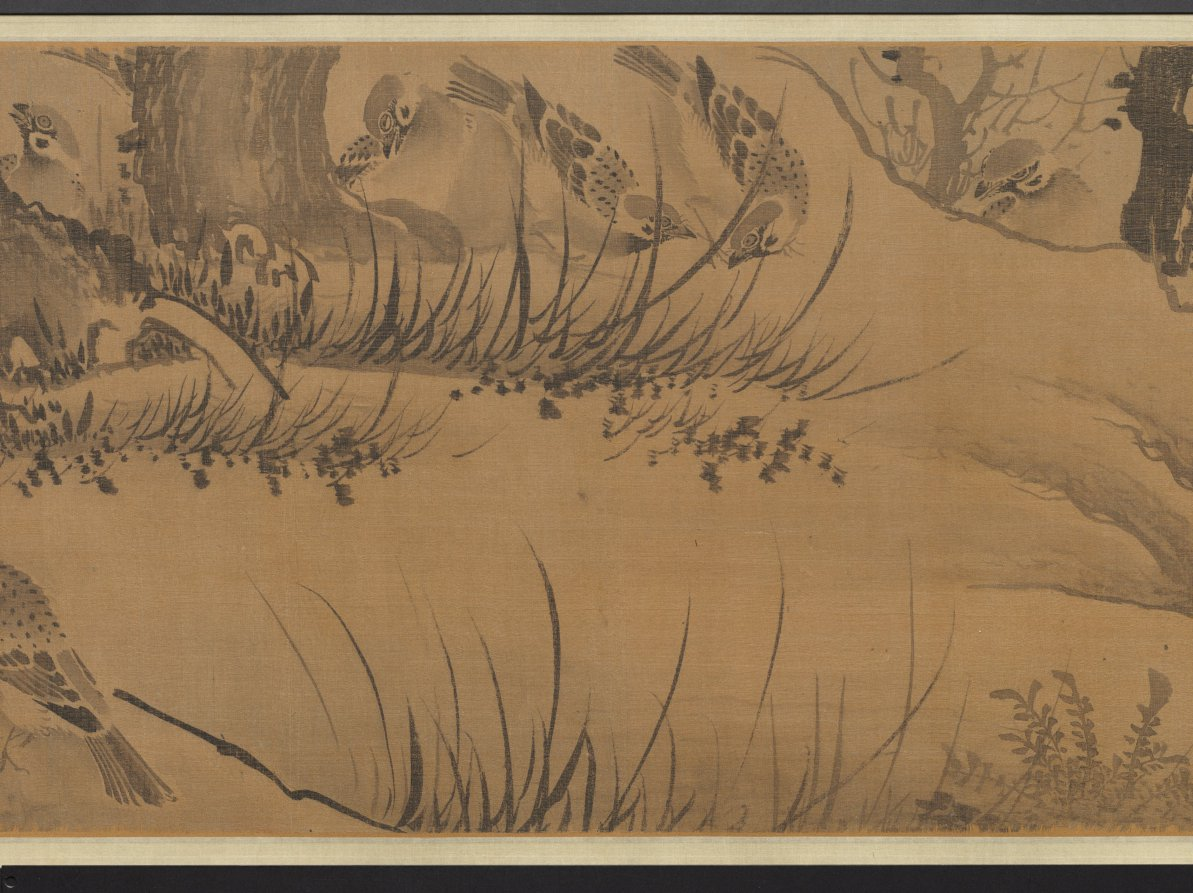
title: A Hundred Sparrows in a Lofty Grove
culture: China, Ming dynasty (1368–1644)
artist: attributed to Lin Liang (Chinese, 1416–1480)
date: 1368–1644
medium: handscroll; ink on silk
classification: Painting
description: Sparrows engaged in all kinds of activities frolic amid leafy branches, blades of grass, rocks, and a waterfall. As our eyes move over the scroll, the artist engages us in enjoying the sparrows’ carefree movements in a natural setting. The charming birds were painted from close observation in swift and fluent brushstrokes. Sparrows are a common bird and in Chinese painting they often represent the commoner in human society as opposed to the noble pheasant or peacock representative of the ruling class.